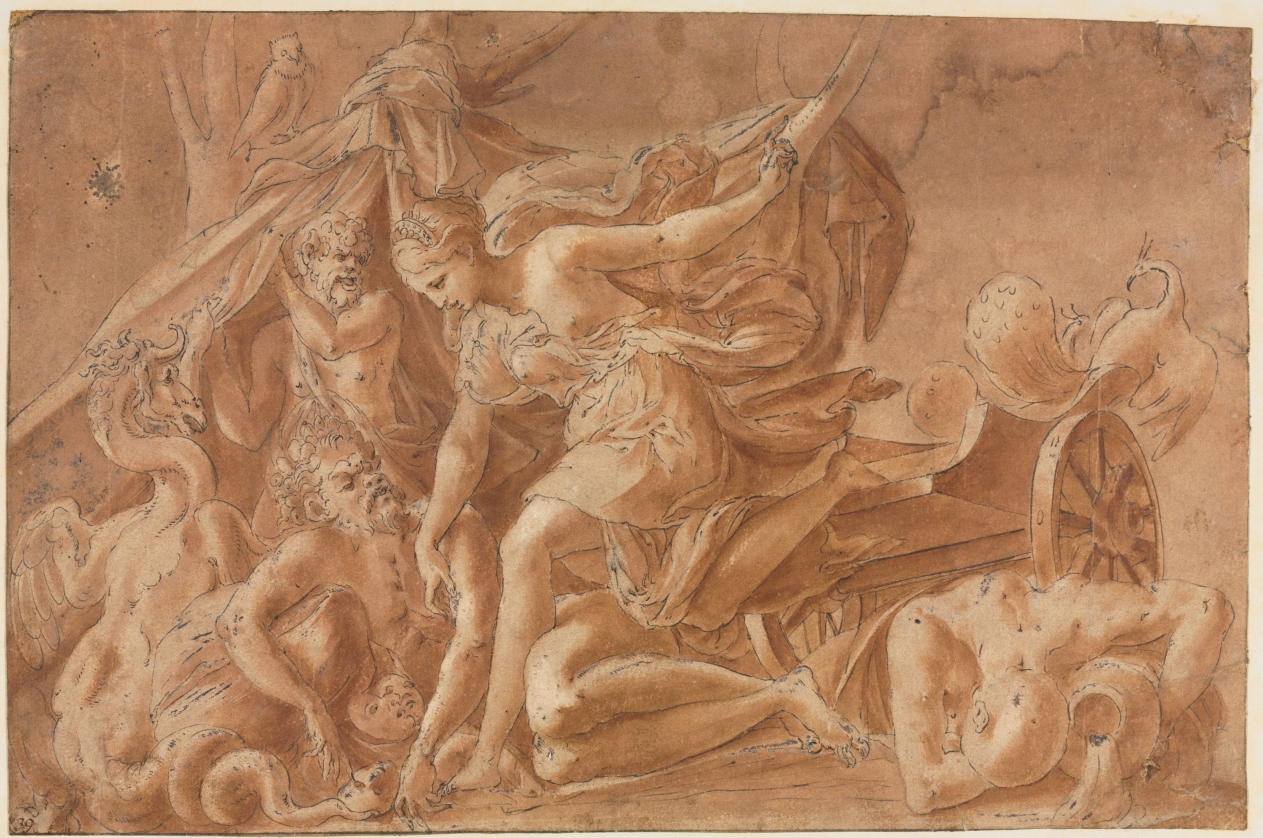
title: Copy after Primaticcio's Juno Awakening Sleep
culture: France, 16th century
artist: copy after Francesco Primaticcio (Italian, 1504–1570)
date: after 1535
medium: pen and black ink (with point of brush?) and brush and red-brown wash (red chalk wash?), heightened with lead white (partially oxidized); framing lines in brown ink with traces of gold paint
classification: Drawing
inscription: lower left, in brown ink: 39 ; RECTO OF SECONDARY SUPPORT, lower center, in brown ink: Federigo Zucchero / Born 1539 Died 1609 ; lower left, in graphite: Identical / Weak Copy after Uffizi drawing (see Gernsheim #1573) [22 x 33 cm]. [brackets part of inscription] / by Primaticcio . ; lower left, in graphite: (22.2 x 33.5) ; lower right, in graphite: Cotton, Colln ; lower right, in graphite: A 5289